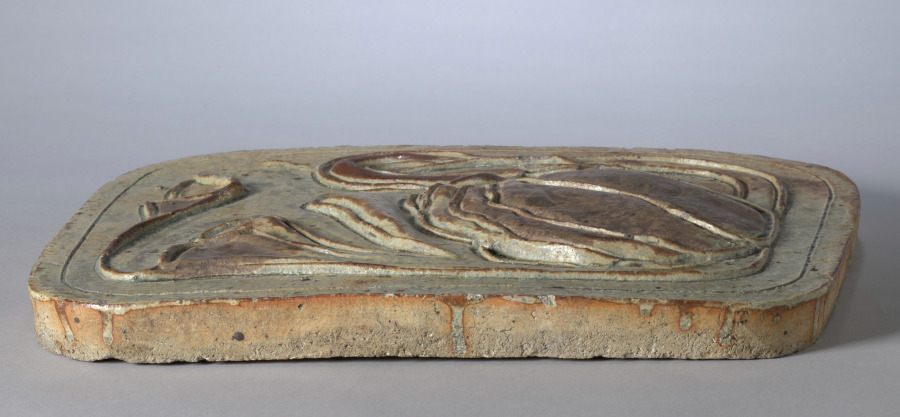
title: Tile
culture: France, early 20th Century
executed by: Alexandre Bigot (French, 1862–1927)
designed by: Henri Sauvage (French, 1873–1932)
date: c. 1900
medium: earthenware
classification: Ceramic